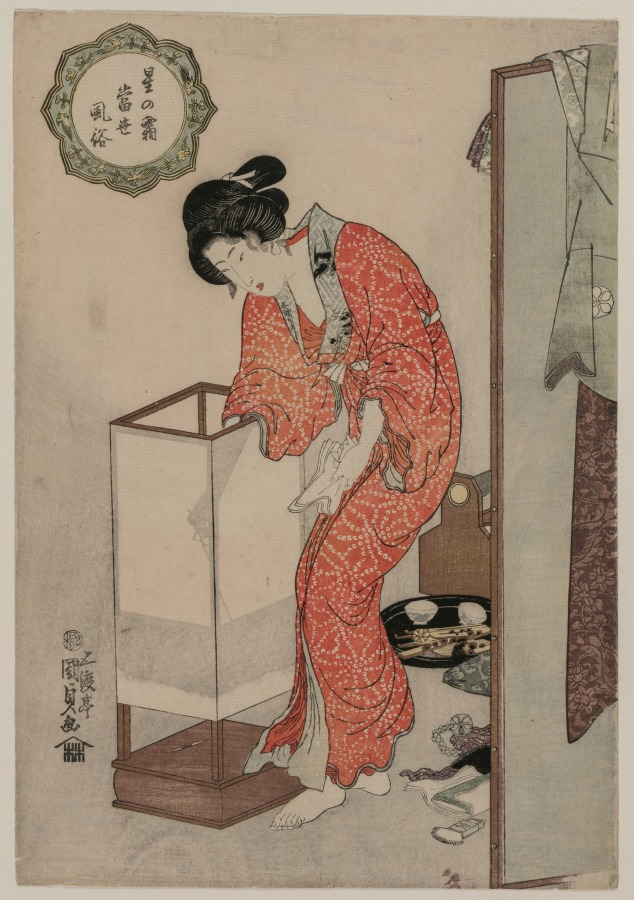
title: Woman Putting Out a Light (from the series Modern Customs: Frost Beneath the Stars)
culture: Japan, Edo period (1615–1868)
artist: Utagawa Kunisada (Japanese, 1786–1865)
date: c. 1820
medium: color woodblock print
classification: Print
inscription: Signature: Gototei Kunisada ga.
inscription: Publisher: Iseya Rihei (emblem). Censorship Seal: kiwame.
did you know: The woman's under robe has a painted collar signed Gototei, the secondary name of Kunisada.